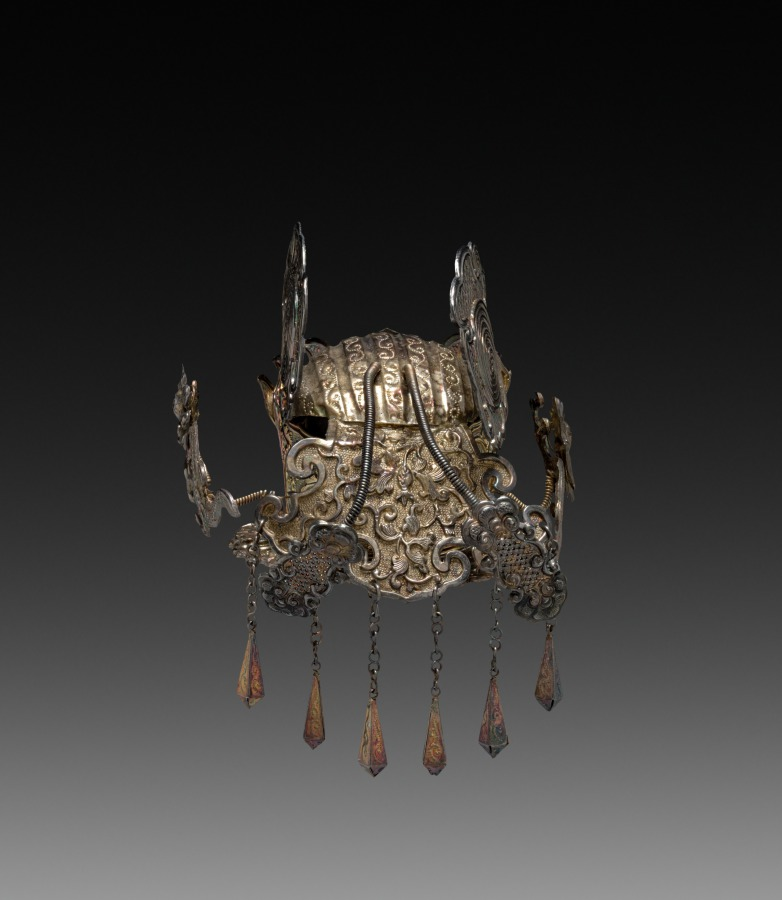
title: Model of a Hat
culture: China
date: early 1900s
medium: silver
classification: Metalwork